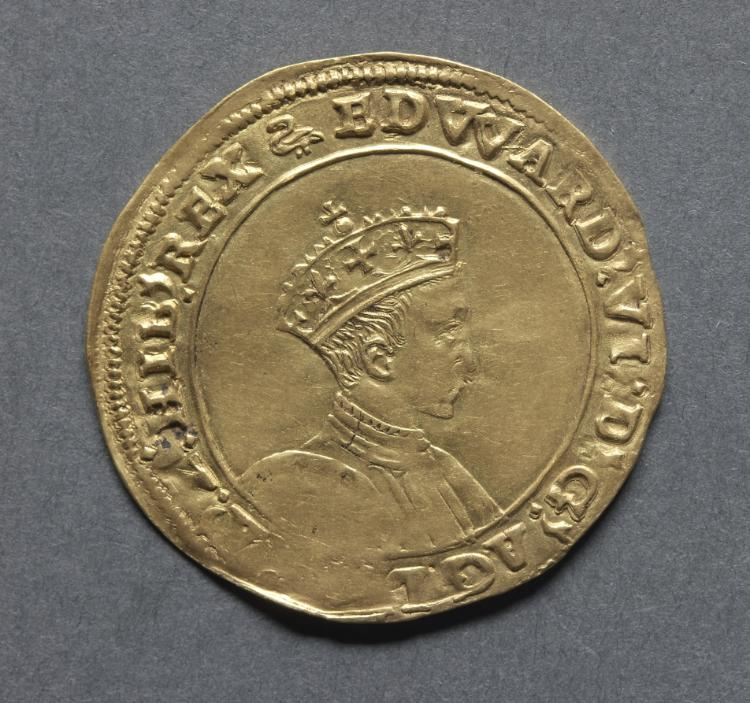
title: Half Sovereign: Edward VI (obverse)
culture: England, Edward VI, 1547-1553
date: 1549–1550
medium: gold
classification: Coins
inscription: EDWARD. VI. D. G. AGL FRA. Z. HIBER. REX